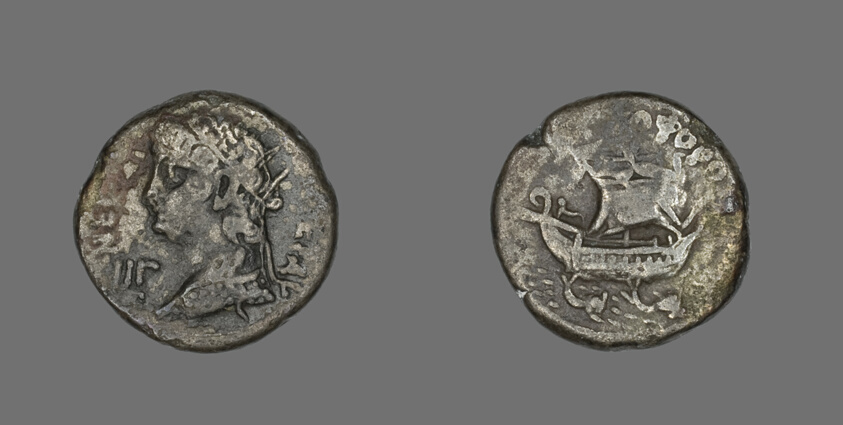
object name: Coin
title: Coin Portraying Emperor Nero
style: roman period (egyptian), greco-roman (egyptian)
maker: Roman, minted in Alexandria, Egypt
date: 66-67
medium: Billon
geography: Egypt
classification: coin; ancient art